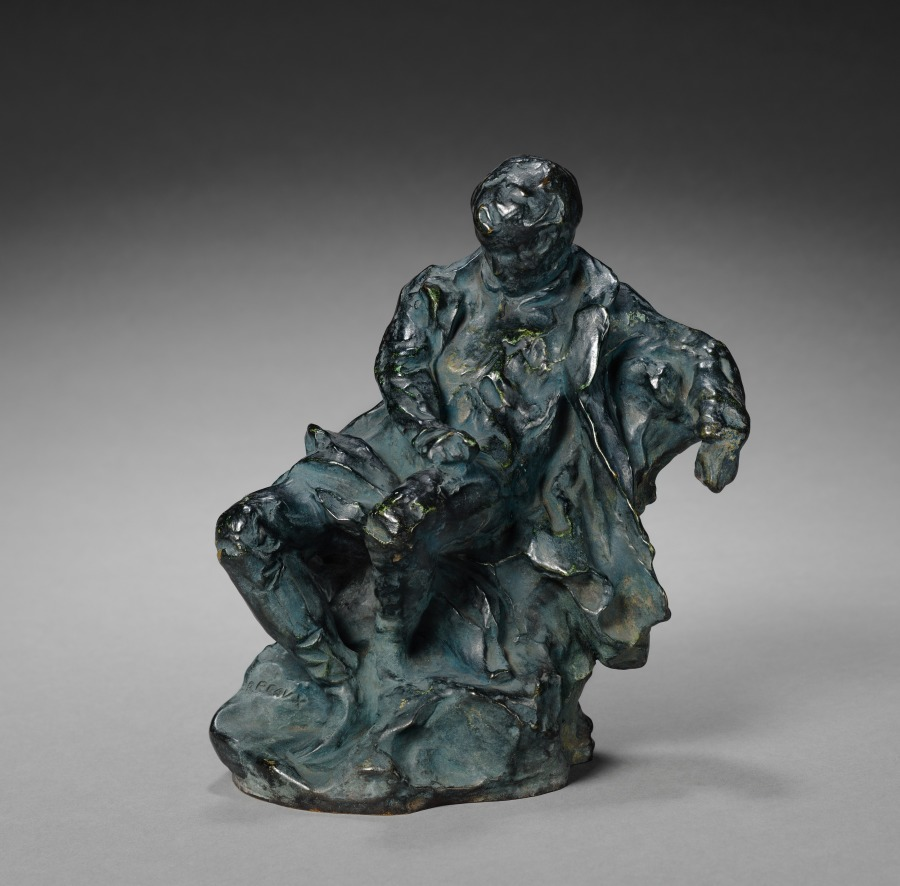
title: Napoleon on St. Helena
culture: France, 19th century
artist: Jean-Baptiste Carpeaux (French, 1827–1875)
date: c. 1860–1870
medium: bronze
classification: Sculpture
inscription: Carpeaux, probably in the wax model, left of Napoleon's foot; on back, an inscription, perhaps the foundry name, has been obliterated with tool marks.